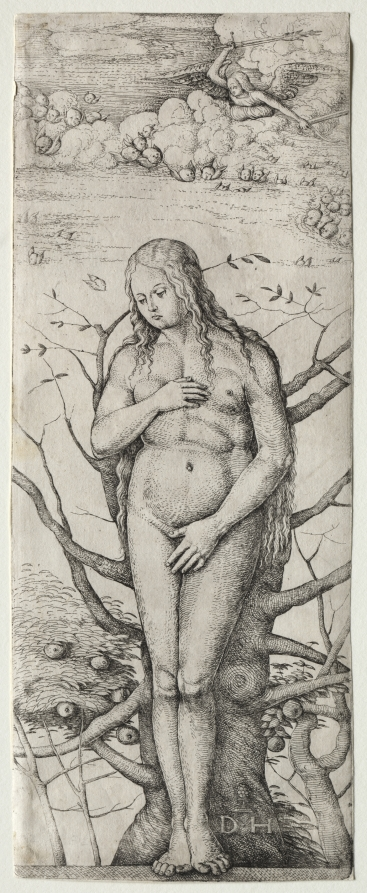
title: Eve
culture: Germany, late 15th-early 16th century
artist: Daniel Hopfer (German, c. 1470–1536)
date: 1505–36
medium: etching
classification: Print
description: Sometimes the scarcity of nature is just as significant as its abundance. Here, a tree that appears to be dying forms the backdrop for Eve, who covers herself in a pose associated with modesty in Classical sculpture. Her arms convey the shame of sin, a state of despair emphasized by her downward gaze. The dying tree also suggests paradise lost, the inevitability of death. Daniel Hopfer was one of the first artists to use the etching technique, printing his works from iron plates, rather than copper, as became common later.